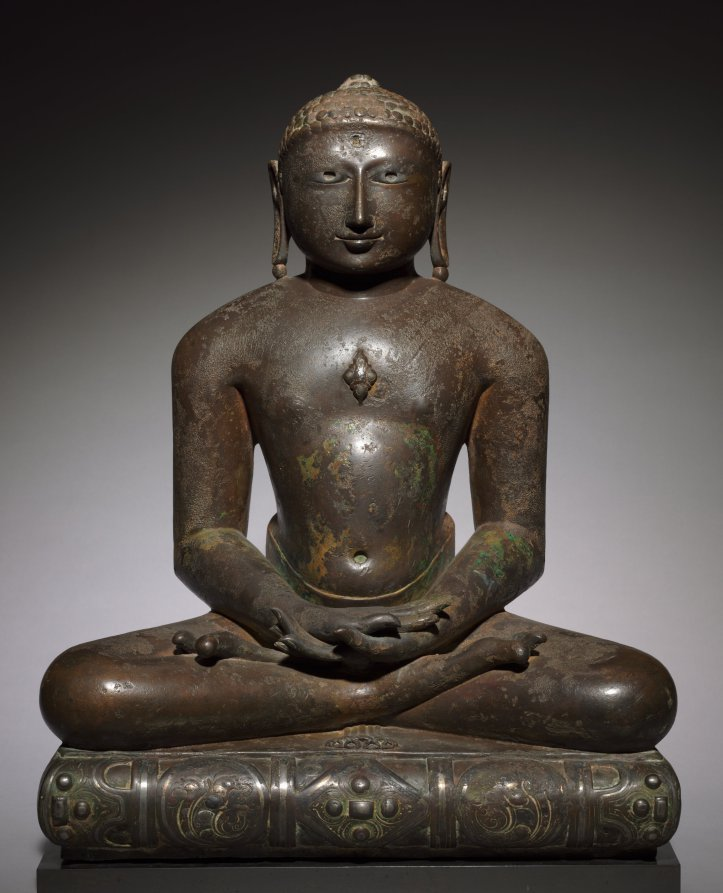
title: Jina (Tirthankara)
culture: India, Rajasthan, Medieval period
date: 900s–1000s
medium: bronze with silver inlay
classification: Sculpture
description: Jainism was one of the three major religions to evolve in India, the other two being Hinduism and Buddhism. While each religion developed its own particular characteristics, their beliefs maintained a common ground with Hinduism. In both Jainism and Buddhism, deities symbolize enlightened beings whose example is meant to inspire believers in following the path toward salvation rather than worshipping them. In Jainism the most common deities are Jinas (meaning "liberators" or "victors"), also known as Tirthankaras ("holy men"). As the name implies, they are beings "liberated" through enlightenment from the cycle of rebirth. There are 24 of these Jain patriarchs. This sculpture represents one of the 24 Jinas, but the absence of attributes makes it impossible to determine which one. This is not surprising since Jinas tend to look alike. Although this figure wears a cloth around his waist, Jinas are usually shown naked—a reference to their renunciation of worldly goods—and seated cross-legged in the posture of meditation (dhyanasana) with their hands resting in their laps (in the dhyana mudra), palms turned upward. Their physical appearance is always the same: broad shoulders, tapering torso, and long, highly stylized limbs. The head, with its round face and short-cropped curls, has a small protrusion at the top. The facial expression conveys self-assurance, wisdom, and compassion. Such a figure would usually have a halo attached to the back of the head. The present bronze dates to a time when some of the finest Jain sculptures and monuments were produced in India, as documented by such temples as Mt. Abu in Rajasthan (the area where this sculpture originated), Khajuraho in Madhya Pradesh, or Srivana Belgola in Karnataka.